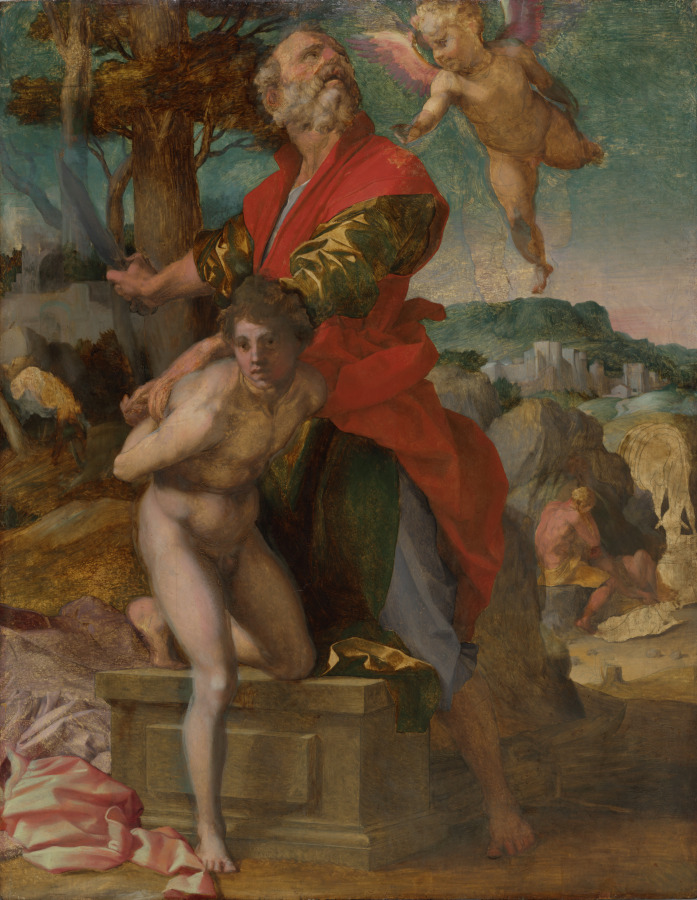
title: The Sacrifice of Isaac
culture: Italy, Florence, 16th century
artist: Andrea del Sarto (Italian, 1486–1530)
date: c. 1527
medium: oil on wood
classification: Painting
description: In this dramatic test of faith from the Old Testament book of Genesis, Abraham agrees to slay his son Isaac on God’s command. As Abraham raises the knife, an angel suddenly appears to halt the sacrifice. This work gains its power from the complex expressions of father and son, combining grief, strength, resignation, fear, and realization in their faces and bodies, the latter inspired by ancient sculpture and Michelangelo. Andrea del Sarto never finished this painting, and it lays bare his working methods. He transferred the design to the panel from a drawing, reinforcing the chalk with painted lines—best seen in the donkey at the far right. He then worked over the whole panel at once with thin, brushy veils of color, letting him alter the composition while painting—especially evident in the angel, Isaac’s body, and Abraham’s head.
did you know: The angel has two visible sets of legs, showing the artist’s revision of the composition.